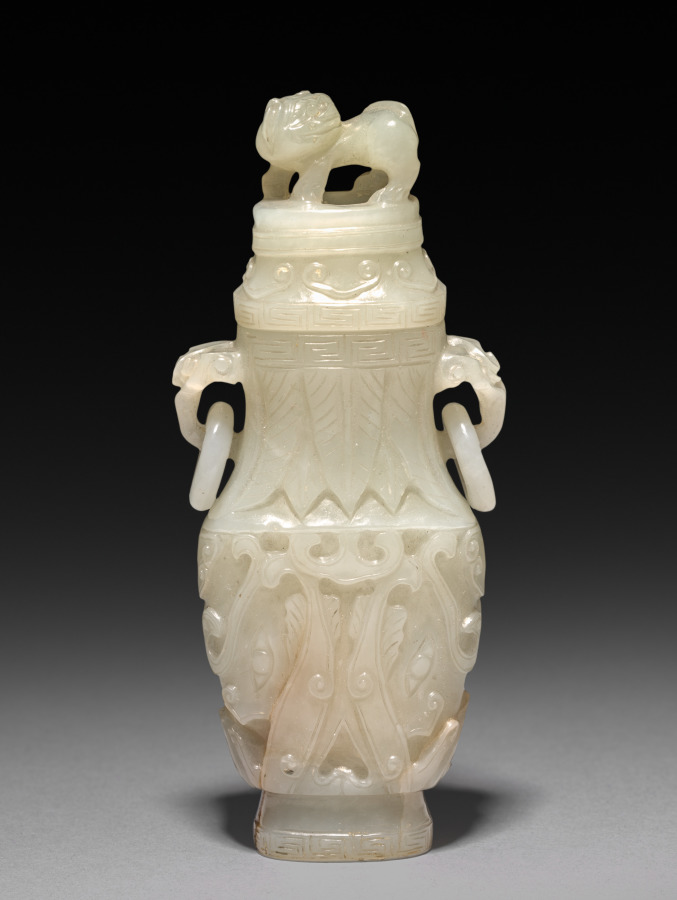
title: Jar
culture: China, Qing dynasty (1644-1911)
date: 1644–1911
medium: jade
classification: Jade